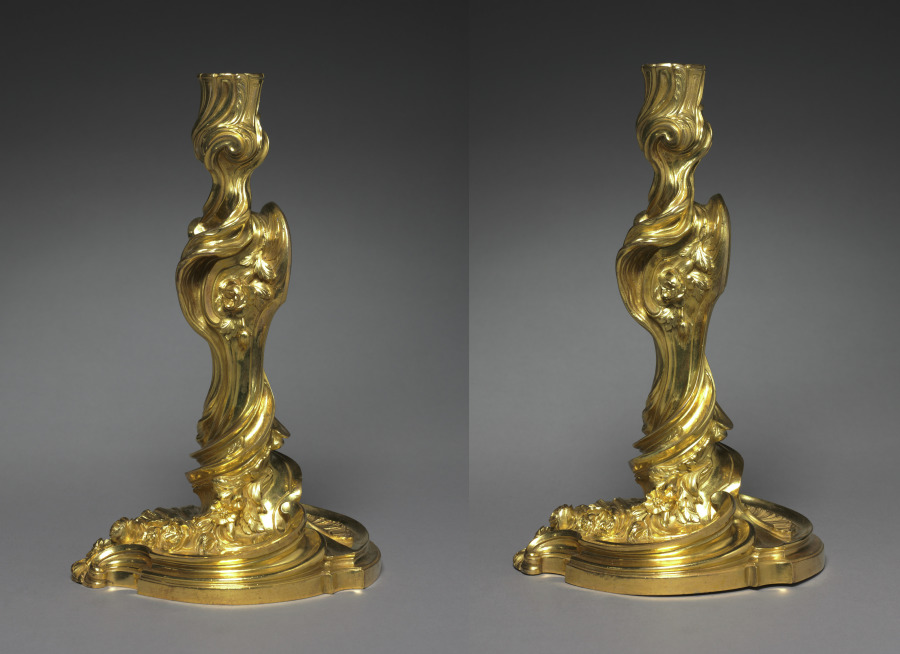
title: Candlesticks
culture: France, 18th century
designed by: Juste-Aurèle Meissonnier (French, 1695–1750)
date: c. 1740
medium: gilt metal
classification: Furniture and woodwork